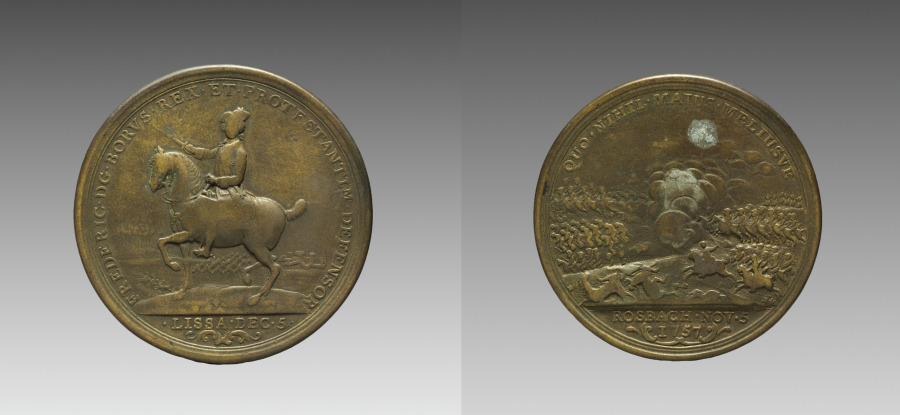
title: Portrait of Frederick the Great, King of Prussia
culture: Germany, 18th century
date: 1757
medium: bronze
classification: Sculpture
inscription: "FREDERIC. DG. BORVS. REX, ET. PROTESTANTIM. DEFENSOR LISSA. DEC. 5."